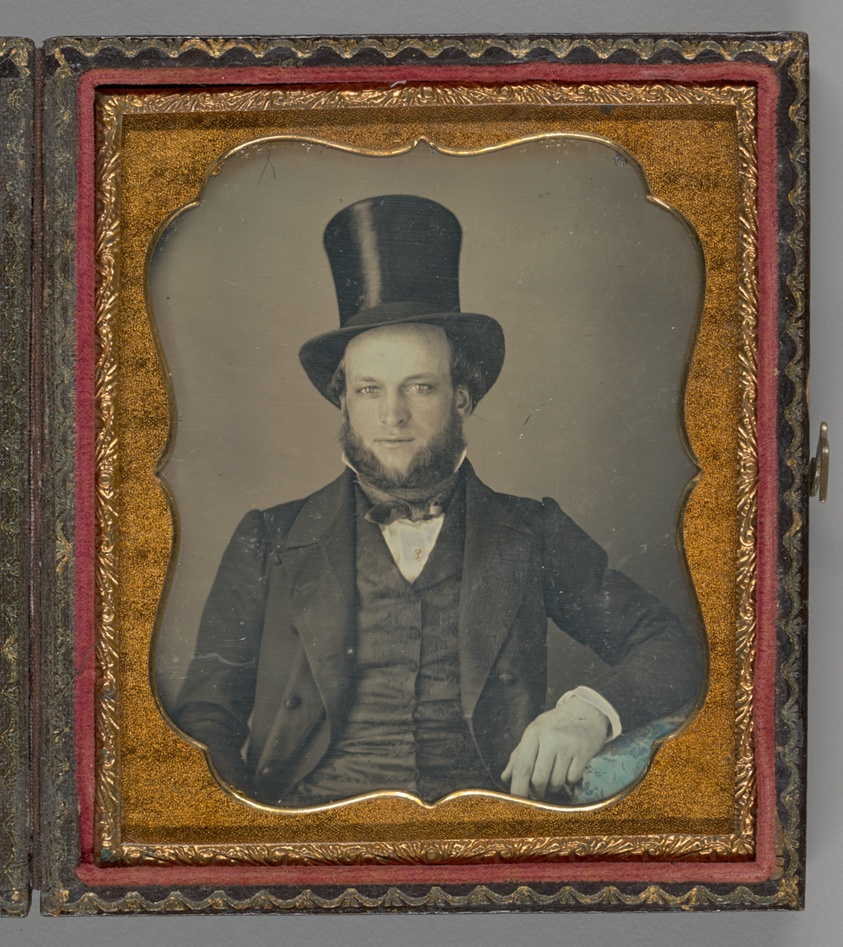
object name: Photograph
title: Untitled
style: 19th century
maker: Artist unknown; American, 19th century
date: 1839/60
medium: Daguerreotype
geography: United States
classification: daguerreotype; photographic process; photography; photograph